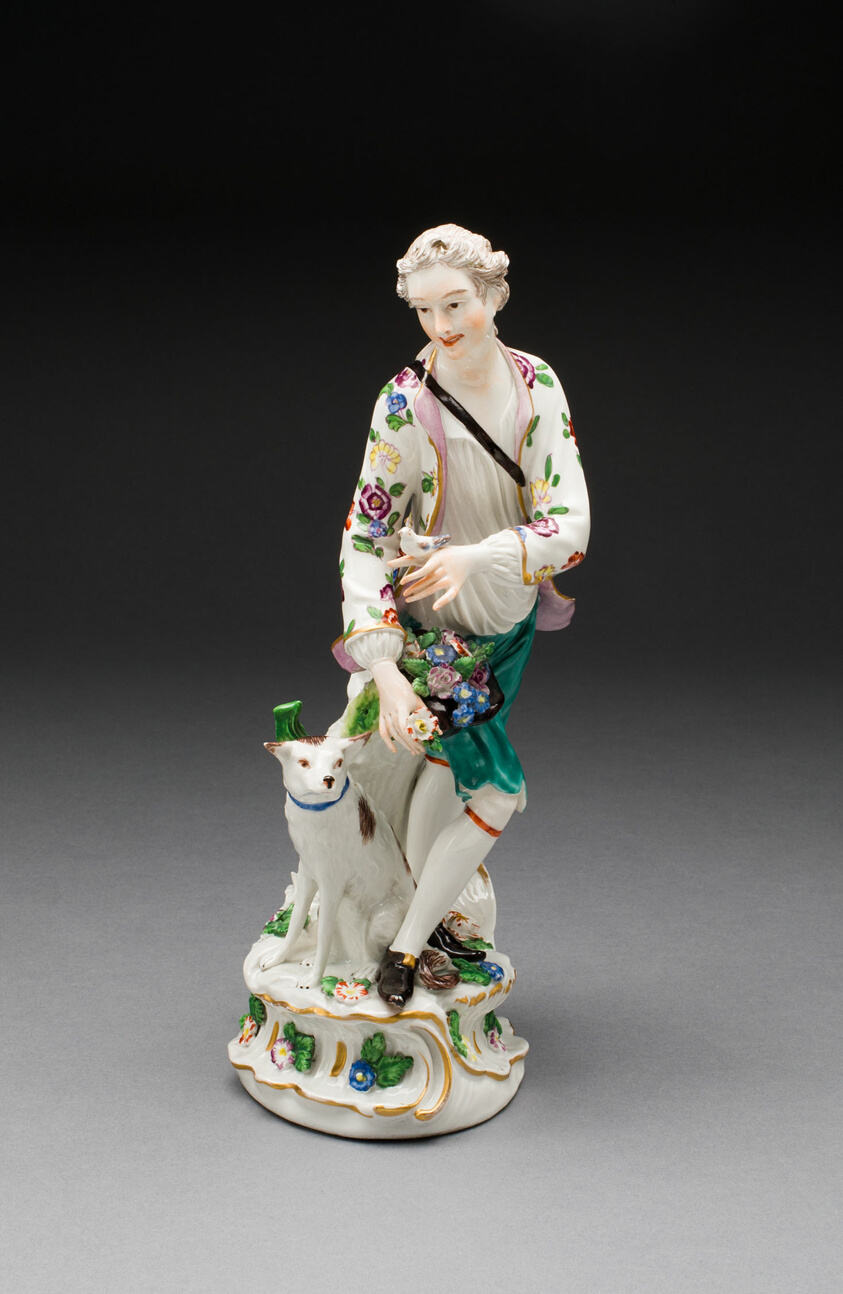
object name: Ceramics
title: Figure of a Man and Dog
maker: Germany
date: Late 18th century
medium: Hard-paste porcelain with polychrome enamel decoration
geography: Germany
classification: sculpture; porcelain; european decorative arts; ceramics